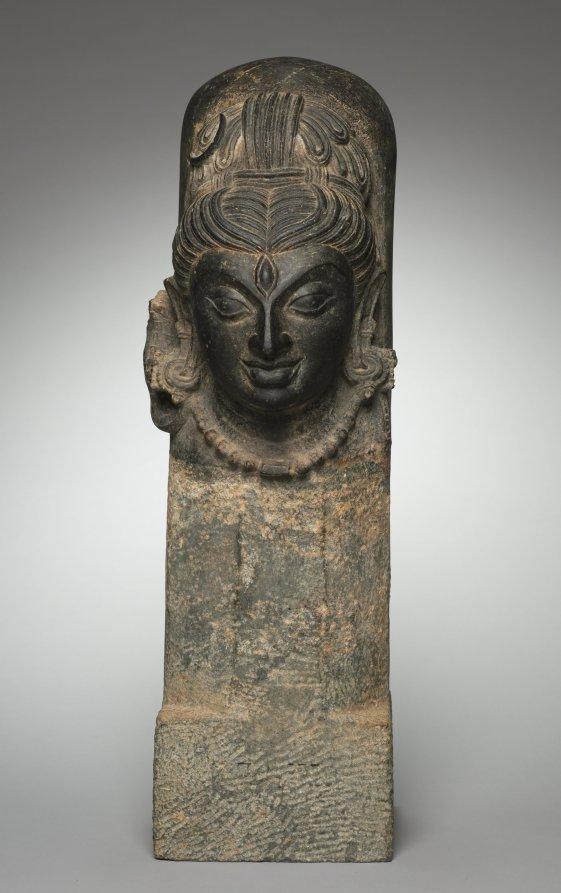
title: One-Faced Linga (Ekamukhalinga)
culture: Eastern India, Bihar, Medieval period, Pala dynasty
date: 600s–700s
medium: chloritic schist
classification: Sculpture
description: The innermost sanctum of a Hindu temple dedicated to Shiva is called a womb chamber in which a stylized phallus called a linga is installed. Together, the chamber and linga represent the potentiality of creation. Artists depict the first stage of creation by a face emerging from the phallus, which embodies one aspect of Shiva. This face is of a powerful yogi, with long matted locks adorned with a crescent moon. He has a penetrating gaze with all three of his eyes. This icon would have been accessed primarily by Brahmin priests who would perform rituals honoring Shiva as the ultimate creator of the world.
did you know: Some lingas have four faces that indicate a more advanced stage of creation.